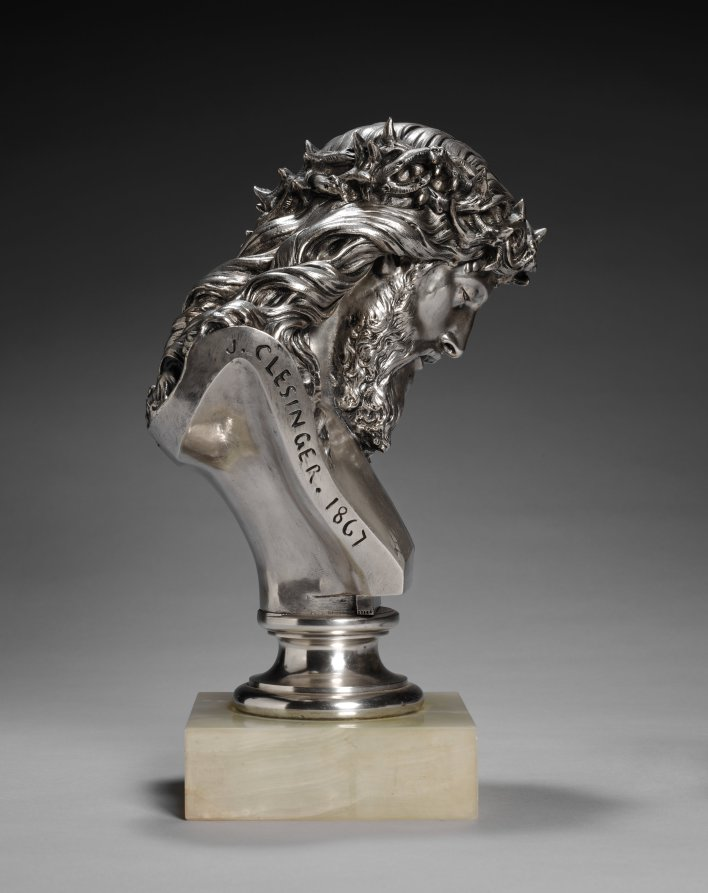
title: Head of Christ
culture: France, 19th century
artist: Jean-Baptiste Clésinger (French, 1814–1883)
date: 1867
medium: silvered bronze, marble base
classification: Sculpture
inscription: Signed in cut of right proper shoulder: "J. Clesinger, 1867"; inscribed in cut of left proper shoulder: "POUSSIELGUE RUSAND PARIS"; struck immediately above circular base: "17662"